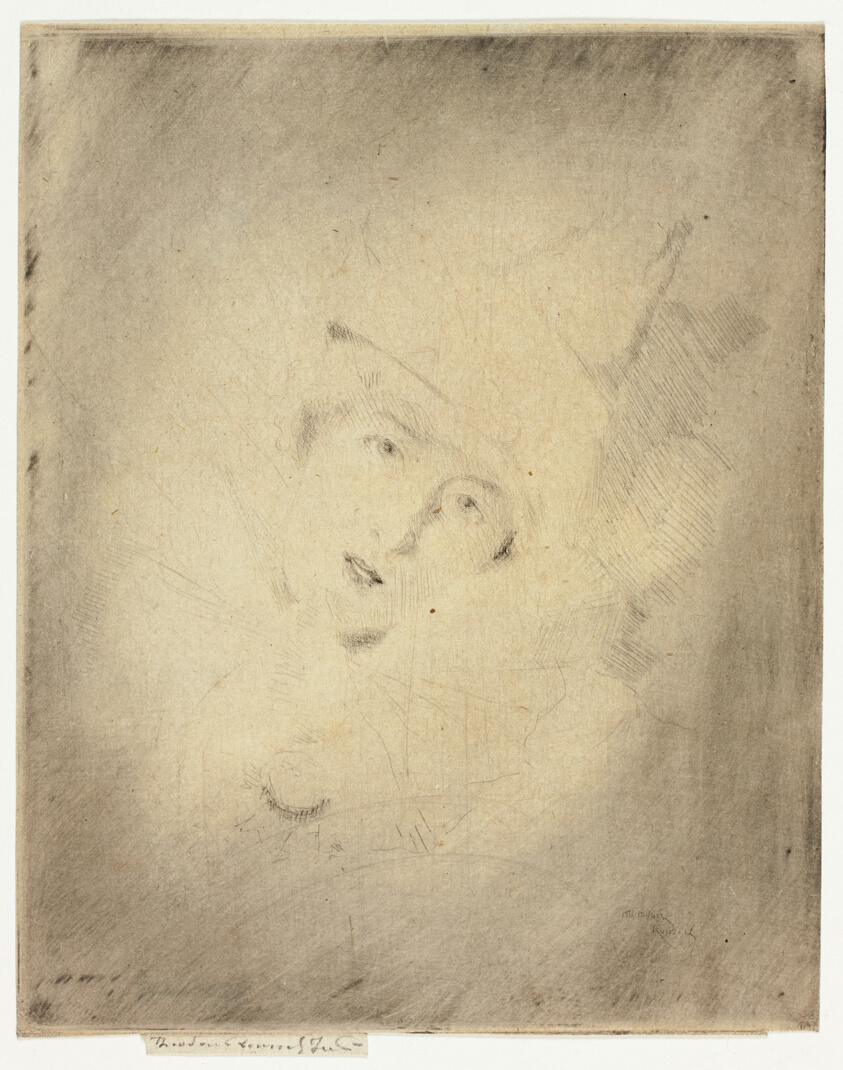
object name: Print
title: Pierrot, Portrait of the Lady A. C.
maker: Theodore Roussel (French, worked in England, 1847-1926)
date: 1888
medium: Drypoint in black on cream laid paper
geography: England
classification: drypoint; print; prints and drawing